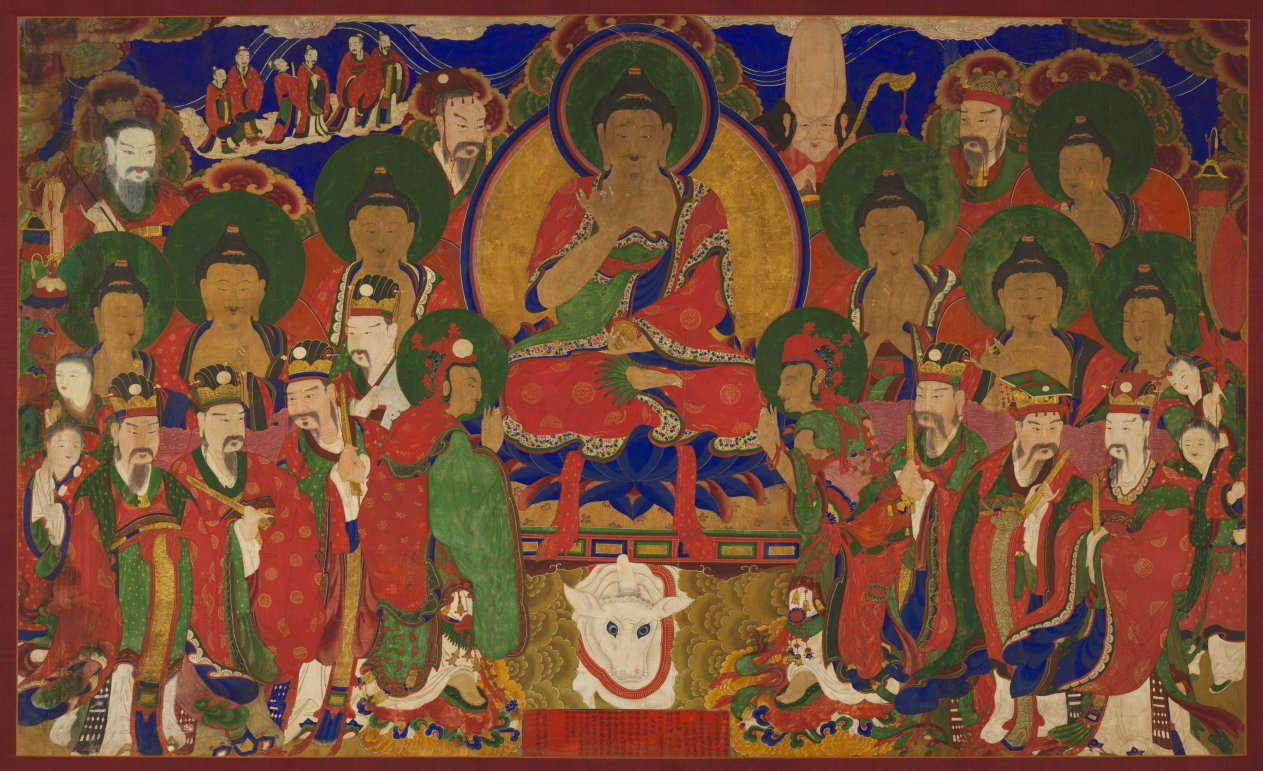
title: The Assembly of Tejaprabha Buddha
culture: Korea, Joseon dynasty (1392–1910)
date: 1878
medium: hanging scroll; ink, color, and gold on silk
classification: Painting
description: The main deity seated at the center is Tejaprabha, the Buddha of Radiant Light. Blazing beams of light emanating from its celestial body are this deity’s weapon to crush all kinds of calamities. Coincidently, when this painting was created, Korea was experiencing a height of foreign military aggressions, including invasions by the French (1866) and the US (1871). The inscription at the bottom center states that a group of ladies from the royal court commissioned the scroll to wish for the well-being of their families. During the late Joseon dynasty, Korean women became largely marginalized. Nevertheless, they remained important patrons of Buddhist art and architecture, voicing their concerns for their country and families in peril.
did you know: The central Buddha of Radiant Light is flanked by two attendant bodhisattvas, Sunlight and Moonlight, each in reverence posture.